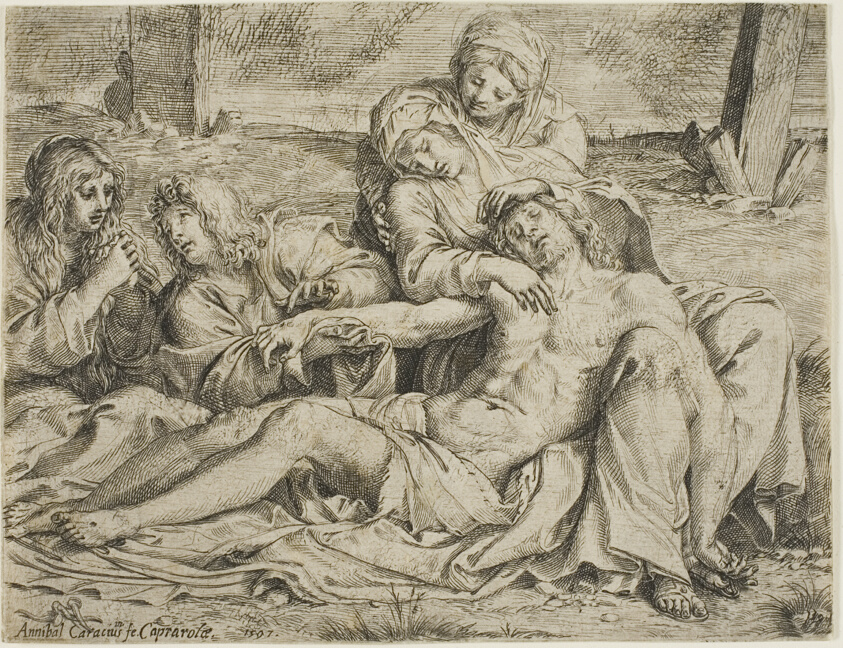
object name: Print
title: Christ of Caprarola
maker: Annibale Carracci (Italian, 1560-1609)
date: 1597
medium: Etching, with engraving and drypoint, on ivory laid paper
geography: Italy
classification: print; prints and drawing